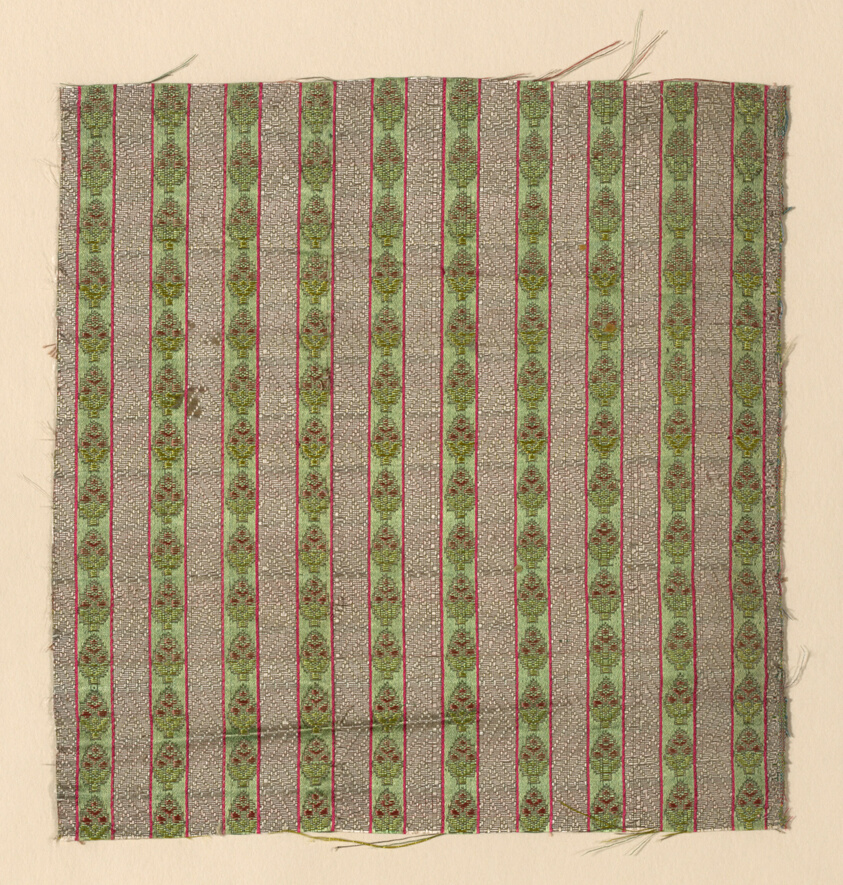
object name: Textile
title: Fragment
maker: India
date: 19th century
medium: Silk; plain compound cloth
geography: India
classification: textile; weaving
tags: floral arrangements